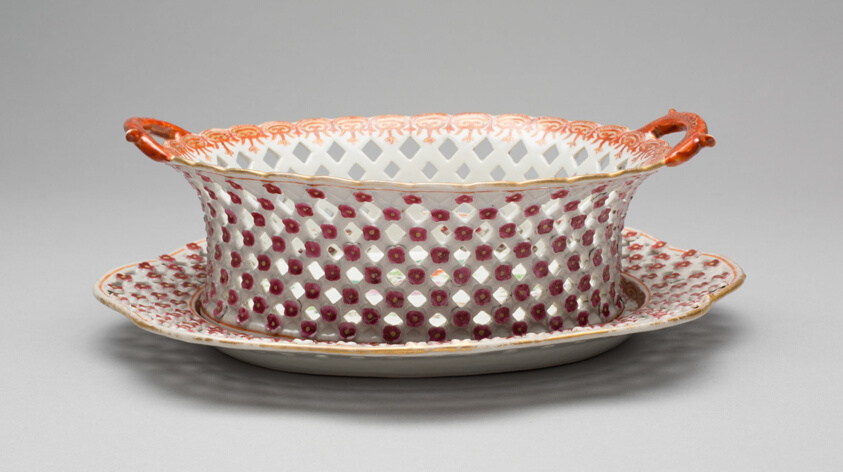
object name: Ceramics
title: Basket and Stand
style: chinese export, Chinese (culture or style), East Asian, asian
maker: China; Chinese, made for the American market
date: c. 1790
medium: Porcelain, enamel, and gilding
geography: China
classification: chinese export porcelain; art of the americas; porcelain; european decorative arts; ceramics; decorative arts; American market; pottery